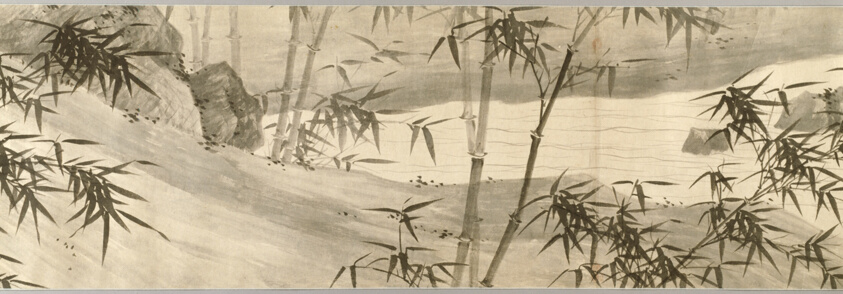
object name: Painting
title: Bamboo-Covered Stream in Spring Rain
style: Chinese (culture or style)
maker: Xia Chang (Chinese, 1388-1470)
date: Ming dynasty (1368–1644), dated 1441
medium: Handscroll; ink on paper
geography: China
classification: handscroll; painting; asian art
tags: landscapes